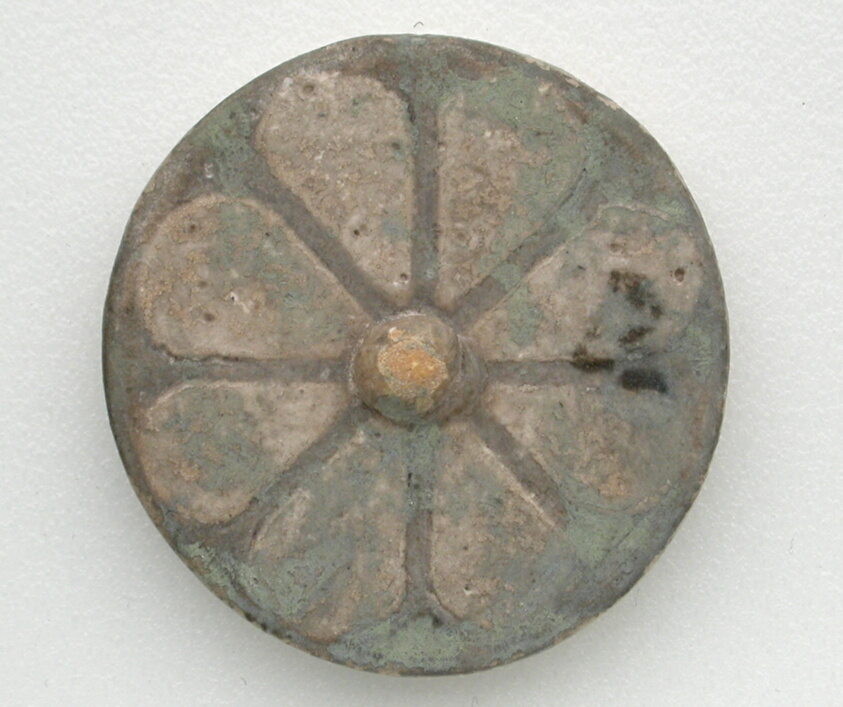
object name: Decorative Arts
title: Rosette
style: new kingdom, egyptian, ancient, ramesside period, twentieth dynasty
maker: Egyptian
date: New Kingdom, Dynasty 20 (about 1186–1069 BCE)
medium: Faience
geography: Egypt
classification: inlay; ceramics; ancient art; decorative arts; faïence (composite material)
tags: flowers